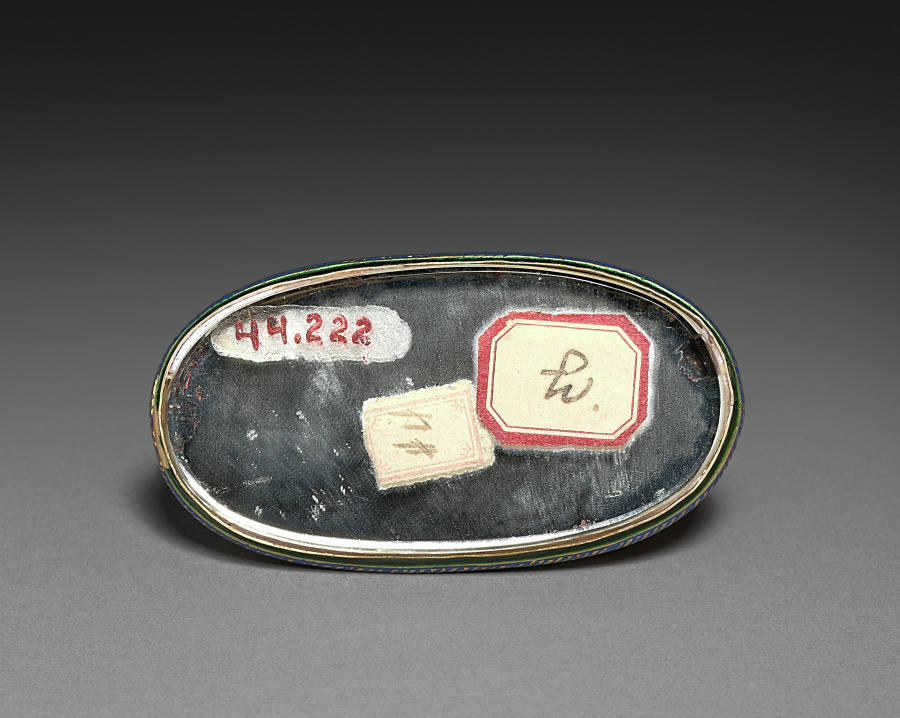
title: Ladies Hand Mirror with Horse as Handle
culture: India, Jaipur, late 18th-19th Century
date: late 1700s-1800s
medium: enamel inlaid with semi-precious stones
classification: Enamel